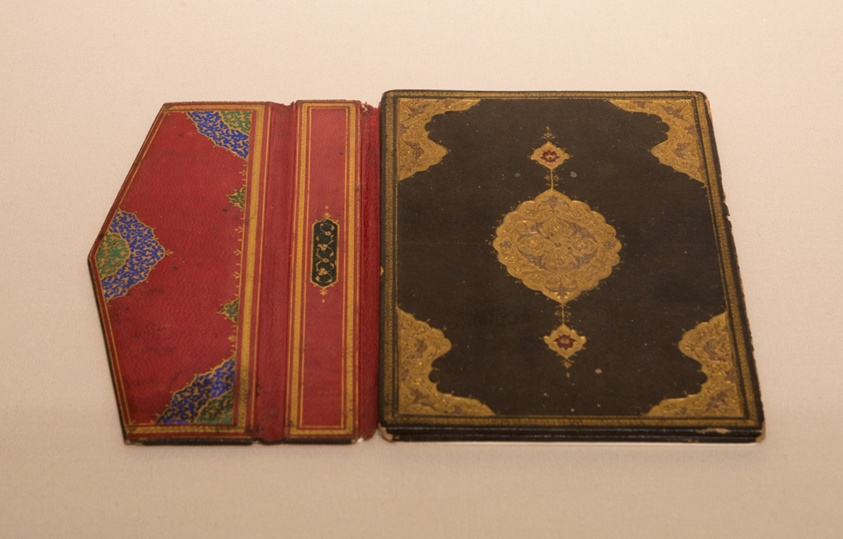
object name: Book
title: Qur'an cover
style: Islamic (culture or style)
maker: Iran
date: 17th century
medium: Leather; exterior: embossed and gilt decoration; interior: filigree and gilt decoration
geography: Iran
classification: manuscript; asian art; book